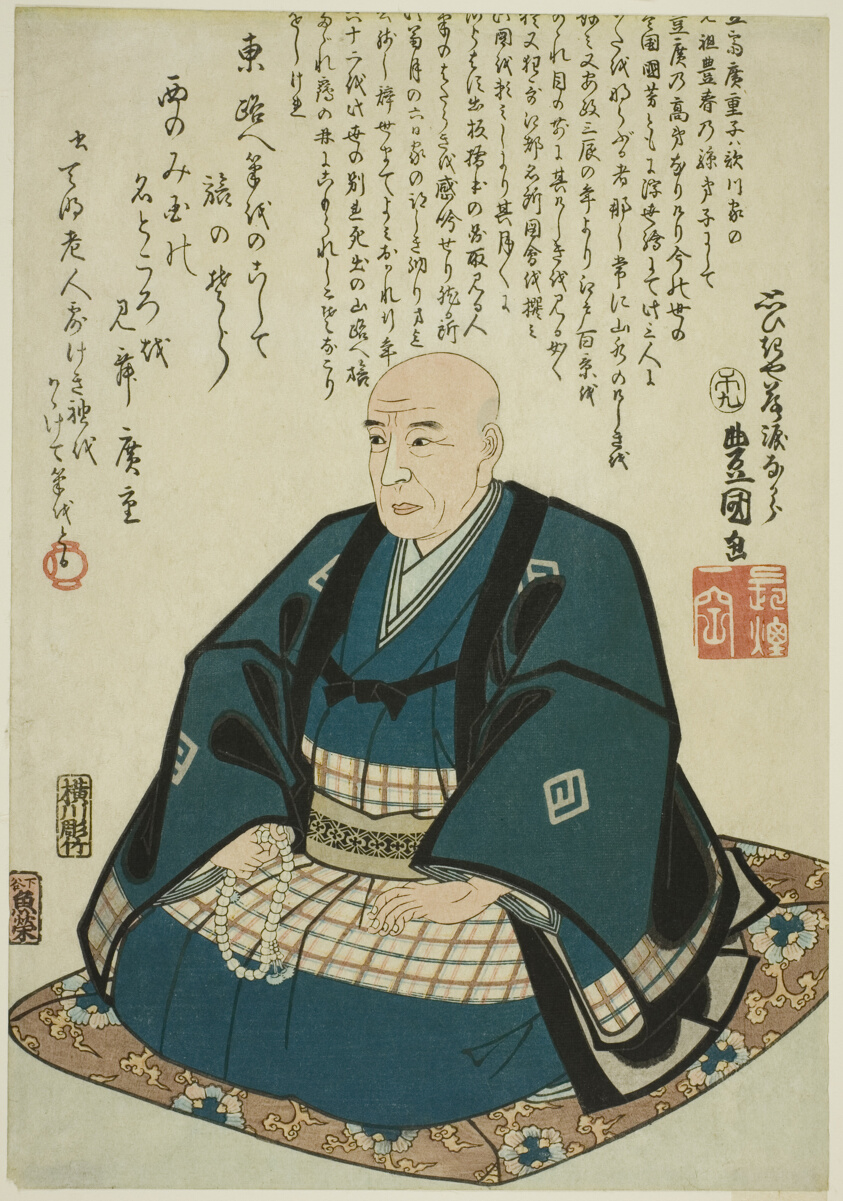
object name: Print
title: Memorial portrait of Utagawa Hiroshige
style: Japanese (culture or style)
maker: Utagawa Kunisada I (Toyokuni III) (Japanese, 1786-1864)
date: 1858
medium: Color woodblock print; oban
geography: Japan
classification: woodblock print; print; asian art